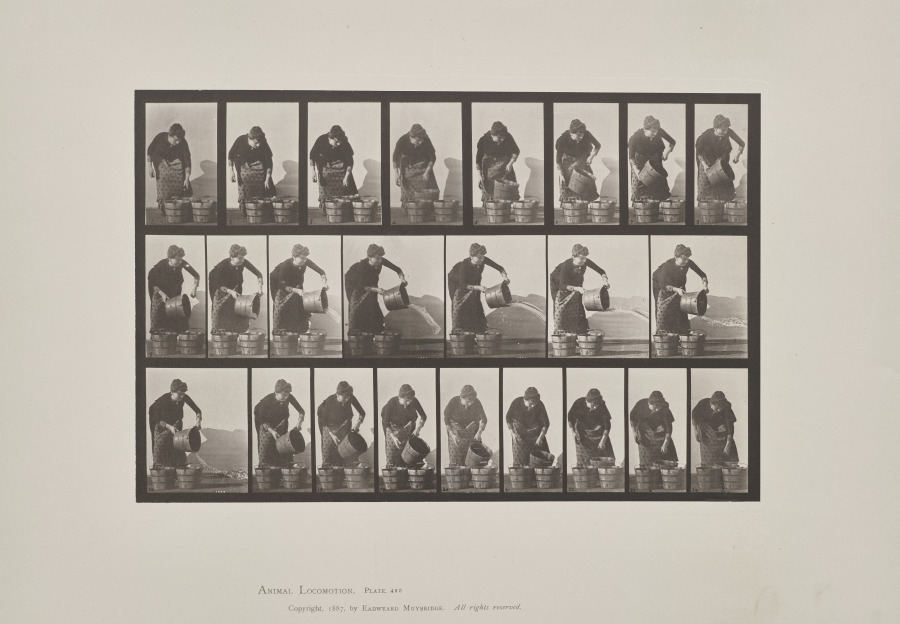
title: Emptying a Bucket of Water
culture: America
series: Animal Locomotion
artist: Eadweard J. Muybridge (American, 1830–1904)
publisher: University of Pennsylvania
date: 1887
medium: collotype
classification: Photograph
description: Eadweard J. Muybridge initially used horses to capture motion as separate slices of time faster than the human eye could perceive them, then moved on to study other animal and human movements. Everyday activities, like emptying a bucket of water, were broken down and sequenced back-to-back. This series was commissioned by the University of Pennsylvania and intended to diagnose dysfunction in human movement by allowing each consecutive action to be studied in isolation. The university’s desire for distribution called for the use of collotype. The process had been recently improved to the point where editions of up to 1,000 were possible, making it an attractive option for publishers.